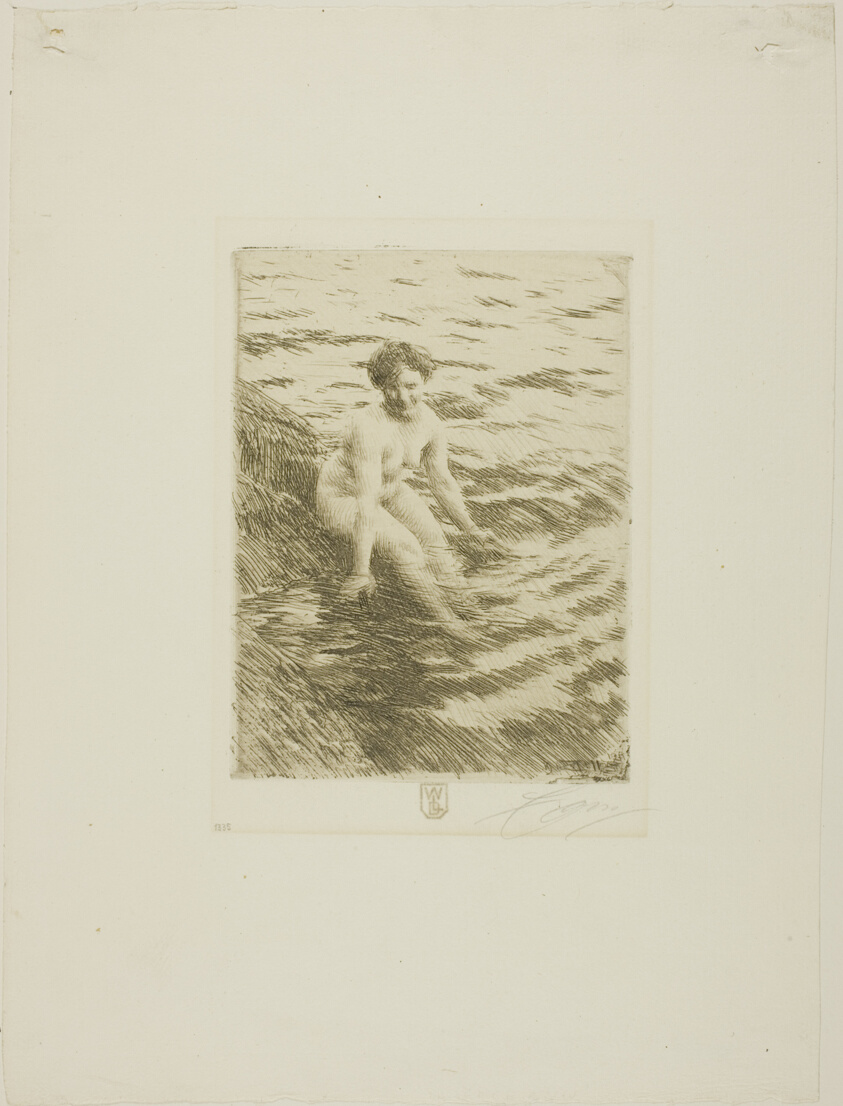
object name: Print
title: Wet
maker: Anders Zorn (Swedish, 1860-1920)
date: 1911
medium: Etching on ivory laid paper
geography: Sweden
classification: etching; print; prints and drawing